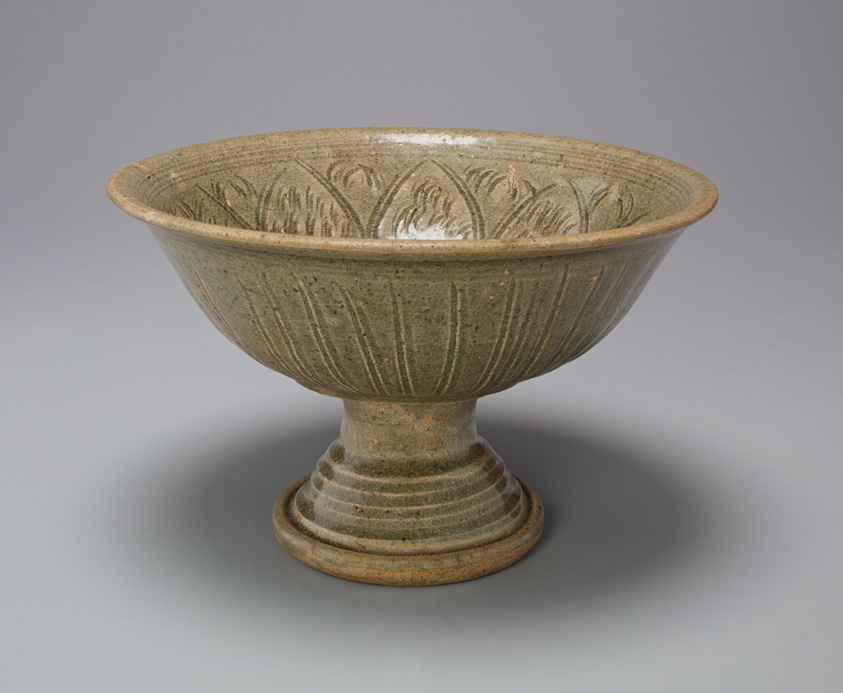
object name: Decorative Arts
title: Sawankhalok Ware Stem Bowl with Incised Lotus Petal Design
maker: Thailand; Sukhothai Province, Si Satchanalai, Sawankhalok Kilns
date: 15th century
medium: Stoneware with celadon glaze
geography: Thailand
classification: stoneware; decorative arts